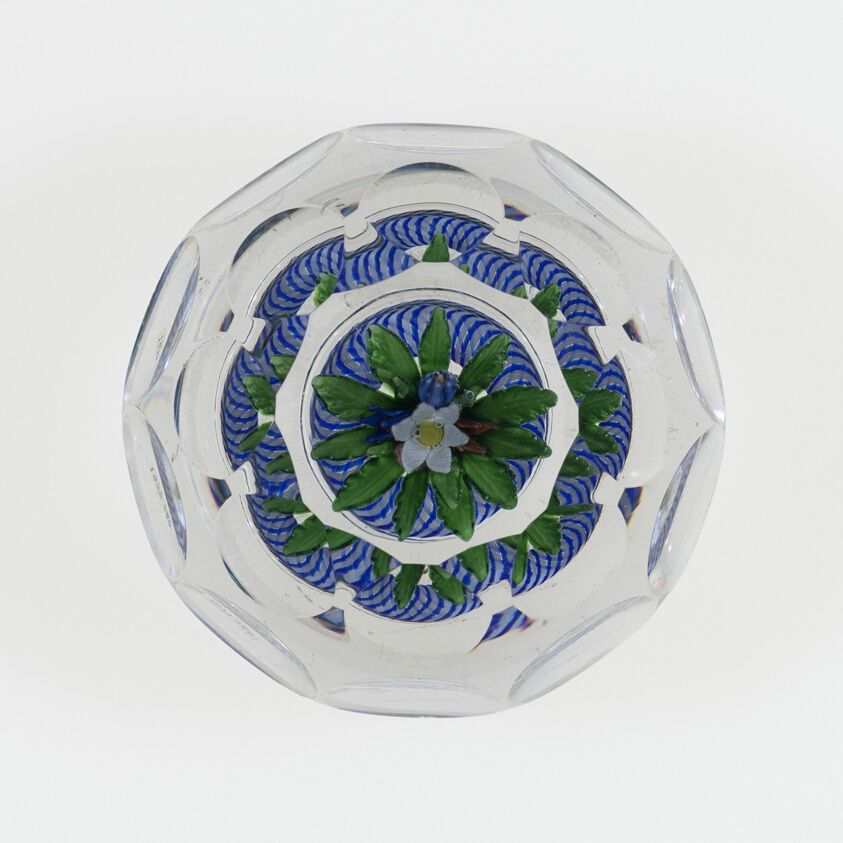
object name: Glass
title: Paperweight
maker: Saint-Louis Glassworks (Cristalleries de Saint-Louis); Lorraine, France, founded 1586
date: c. 1848–55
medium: Glass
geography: Saint-Louis-lès-Bitche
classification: paperweight; lampwork; european decorative arts; glass